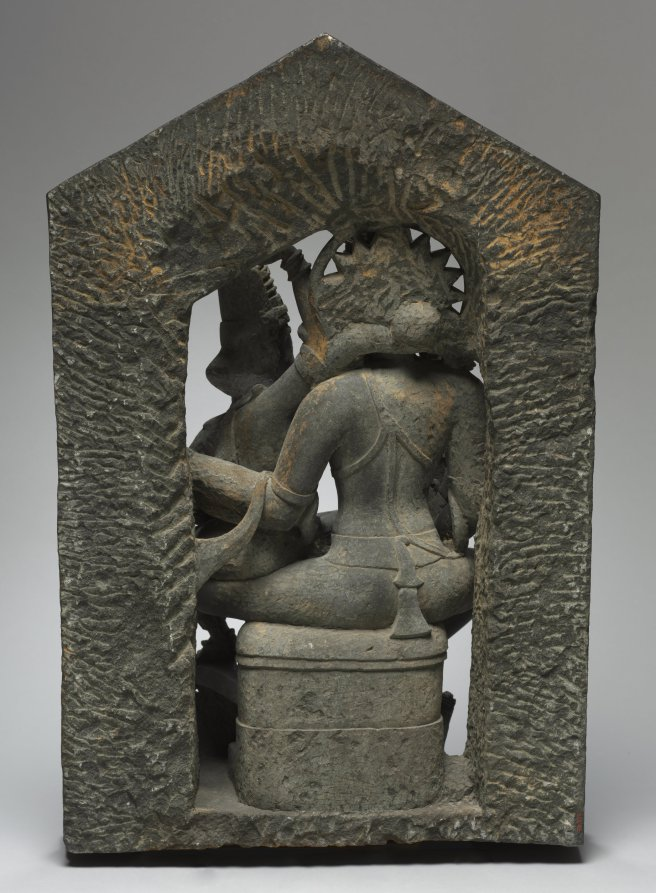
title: Vishnu and Shri Supported by Garuda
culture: Western India, Karnataka, 11th-12th century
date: 1000s-1100s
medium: volcanic Deccan trap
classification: Sculpture